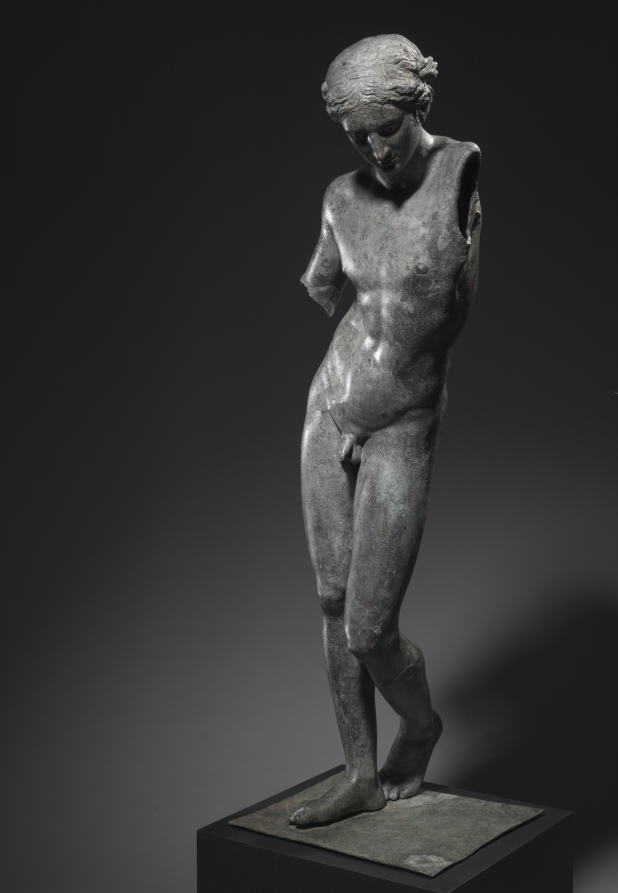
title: The Cleveland Apollo: Apollo Sauroktonos (Lizard-Slayer) or Apollo the Python-Slayer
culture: Greece, Athens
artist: attributed to Praxiteles (Greek, Athenian, c. 400–330 BCE)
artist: or Follower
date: c. 350–200 BCE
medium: bronze, copper, and stone inlay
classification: Sculpture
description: The Cleveland Apollo has been called both Lizard-Slayer (Sauroktonos) and Python-Slayer. The first name comes from the Roman author Pliny the Elder (23–79 CE), who noted in describing bronze works made by the Athenian sculptor Praxiteles (active around 370–330 BCE), “the youthful Apollo [is] known as the Sauroktonos because he is aiming an arrow at a lizard [Greek sauros] which is stealing toward him.” Scholars have long connected this description with artworks showing the young Greek god Apollo in a distinctive pose and hairstyle, standing on his right leg and leaning to his left. In more completely preserved versions, Apollo reaches toward a tree with his left arm and seems to take aim at a lizard. The Cleveland Apollo shows the adolescent god similarly posed and coiffed, making it an important addition to the Apollo Sauroktonos group—the only surviving large-scale bronze sculpture of the type. The young Greek god Apollo, identifiable by his distinctive hairstyle and pose, stands on his right leg and leans to his left, probably toward a now-lost tree. Although now separated, the left forearm and hand survive, together with an unusual lizard-like creature, perhaps drawn from the world of myth. A flat bronze base also remains, though it may be a later adaptation. A tree or other support has been lost, probably smaller than in the marble versions. Given its material and very high artistic quality—note the lifelike hair, fingernails, and inlaid copper lips and nipples—more than one scholar has suggested that the Cleveland Apollo could be the very sculpture seen by Pliny. Some have called the sculpture “Python-Slayer,” seeing the oddly shaped serpentine creature with asymmetrical legs as the mythical Python killed by Apollo in establishing his sanctuary at Delphi. But technical details may explain some of the asymmetry, and no other specific evidence connects it to Delphi. Most scholars would retain the name Sauroktonos (Lizard-Slayer) for the Cleveland Apollo, even as some debate whether it was made by Praxiteles himself or a later follower.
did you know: The Cleveland Apollo is the only surviving large-scale bronze sculpture of its type, Apollo Sauroktonos (the Lizard-Slayer).